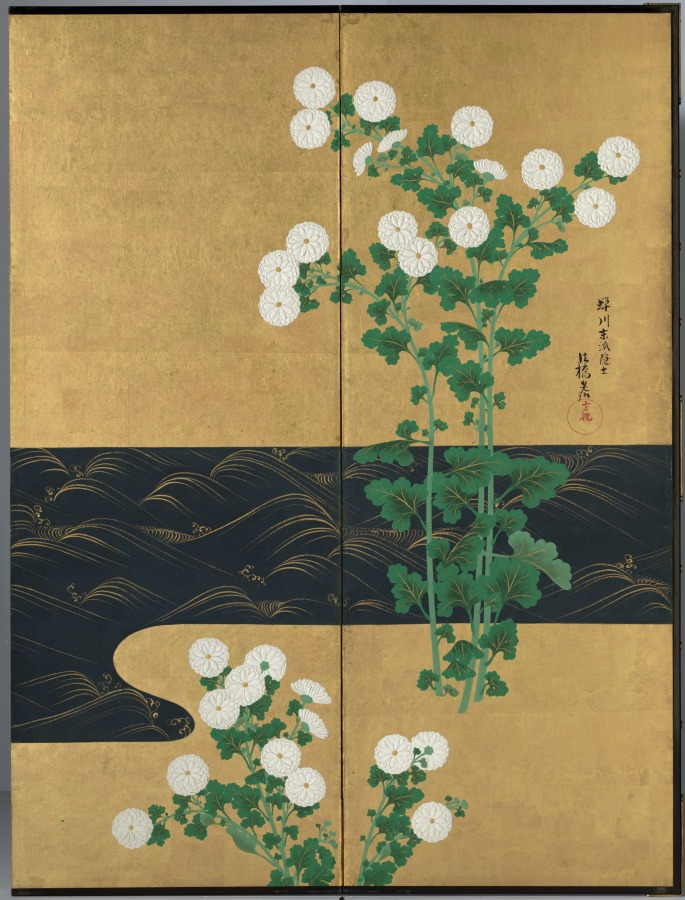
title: Chrysanthemums by a Stream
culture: Japan, Edo period (1615–1868)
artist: possibly by Ogata Kōrin (Japanese, 1658–1716)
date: c. 1715–30 or later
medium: One of a pair of six-panel folding screens; ink and color on gilded paper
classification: Painting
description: These screens recall a painting style so closely identified with Ogata Kōrin (1658–1716) that it is called Rinpa, or “Rin School,” after the ideograph “rin” in his name. The highly stylized background accentuates floral groupings that have been groomed so as to appear utterly artificial, like the synthetic arrangements available today. Kōrin's genius derived in large measure from natural phenomena painstakingly observed and then manipulated to create compositions of startling refinement and sparkling isolation. This process may have grown out of Kōrin's early immersion in the family textile business, a medium that encourages such dramatic distillations of form: the stream's gold-crested waves bring to mind traditional kimono robe designs of Kōrin's era. Works with the signature seen on this painting, including a style name, or persona suggested to Kōrin by his brother Kenzan (1663–1743), are sometimes considered to have been produced either in the last year of his life, when he was very ill, or after his death. In both scenarios, the lion’s share of the work would have been done by studio assistants, but little is truly known of his studio practice. Given the regularity of the gold waves on the stream, and the tension in the arrangement of the chrysanthemums, it is also possible that the screens were made in emulation of Kōrin's designs by a later artist.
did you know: The signature used on these screens may indicate paintings made in the last year of the artist's life, or works completed by his studio after his death.